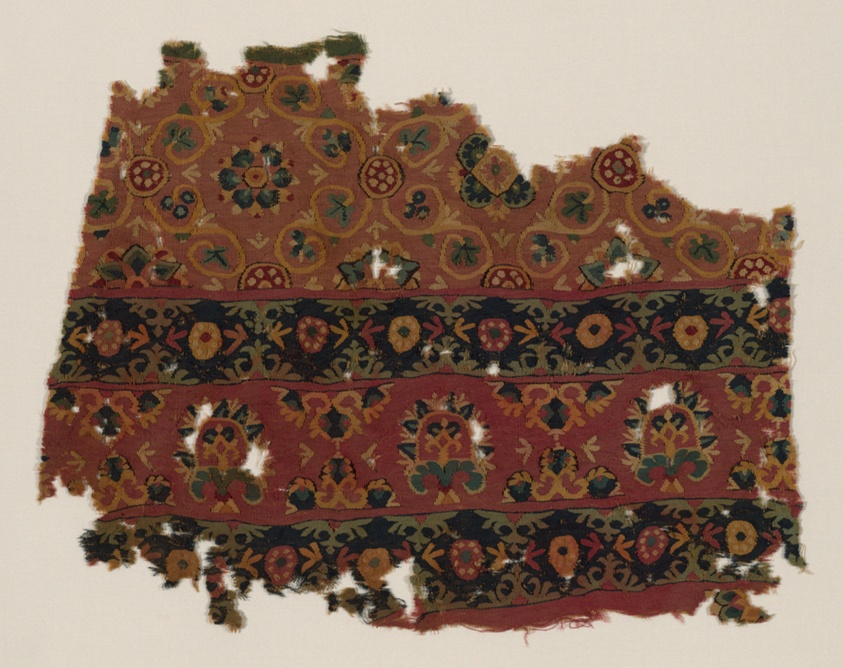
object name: Textile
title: Fragment (Furnishing Fabric)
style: umayyad, persian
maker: Iran, Iraq, or Egypt (Persia)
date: Middle of the 8th century, Umayyad Dynasty (661–750)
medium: Wool, tapestry weave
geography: Persia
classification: textile; weaving; furnishing textile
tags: flowers, medallions, roses